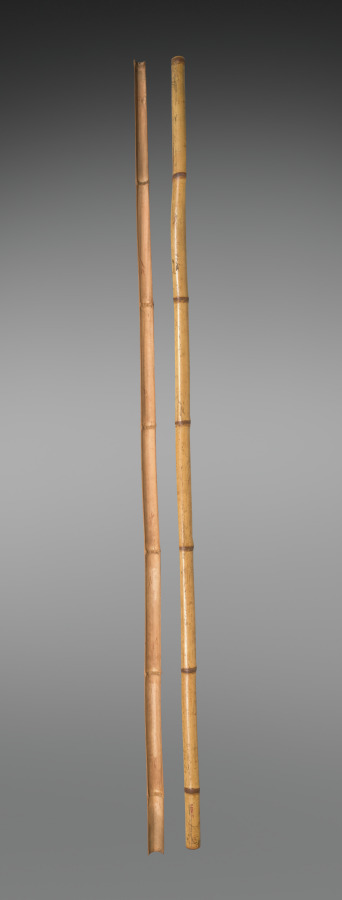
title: Bow: cloth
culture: Japan, Edo period (1615–1868)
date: early to mid-1800s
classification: Arms and Armor